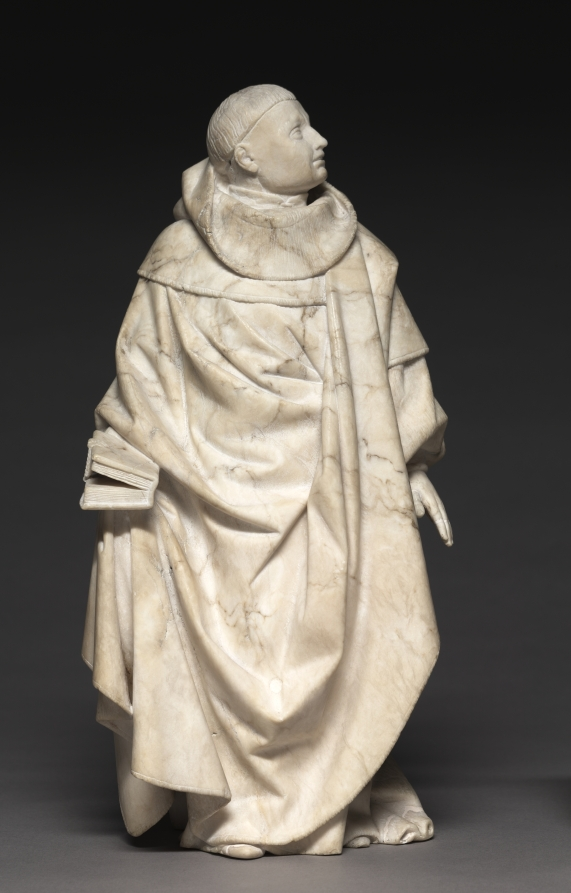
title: Mourner from the Tomb of John the Fearless and Margaret of Bavaria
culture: Spanish, Burgundy, Dijon, 15th century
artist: Jean de la Huerta (Spanish, active Burgundy, 1431–62)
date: 1443–45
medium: salins alabaster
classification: Sculpture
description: This monklike figure has a variously textured monochrome surface. Alabaster’s softness made it easy to carve details like the fabric and fur of the mourner’s robe and the codex pages in his hand. This is one of 40 mourners from an elaborate funeral procession beneath an intricately carved alabaster arcade. This mourner comes from the monastery of Champmol near Dijon, which became a primary burial place for Burgundian dukes. The sculpture was part of the tomb of John the Fearless (1371–1419), commissioned by his son Philip the Good (1396–1467), modeled after the earlier monument for Philip the Bold.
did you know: A plaster cast of this mourner adorns the Tomb of John the Fearless and Margaret of Bavaria in Dijon, France.